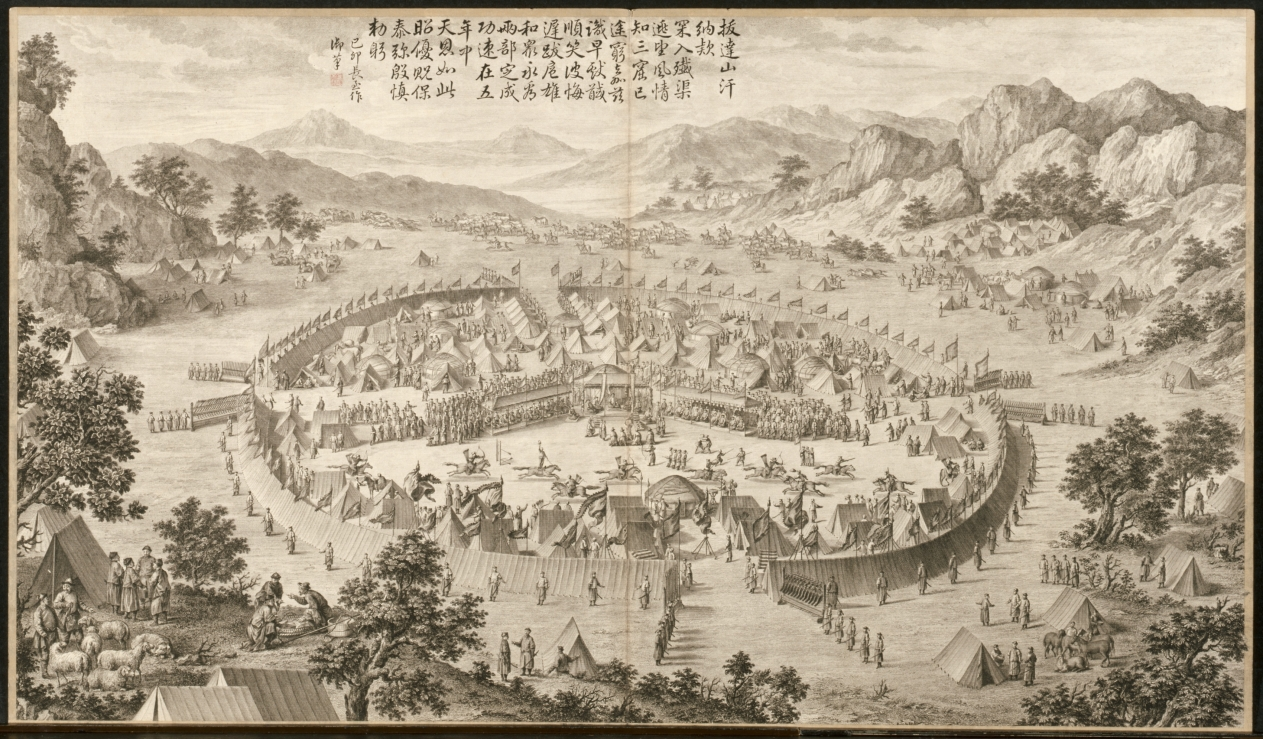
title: Khan of Bada Shan Presenting Tribute: from Battle Scenes of the Quelling of Rebellions in the Western Regions, with Imperial Poems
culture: China, Qing dynasty (1644–1911), Qianlong reign (1736–95)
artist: Jean Damascene Sallusti (Italian, d. 1781)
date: c. 1765–74; poem dated 1759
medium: etching, mounted in album form, 16 leaves plus two additional leaves of inscriptions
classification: Print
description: This set of etchings was commissioned by Emperor Qianlong to record in pictorial terms the courage of his generals and soldiers in quelling the rebellions in the Western Regions. Qianlong added his own poem to each of the etchings, indicating his appreciation and pride in this demonstration of military might. "Western Regions" refers to the present-day Xingjiang province, often described in Western writing as "Central Asia."